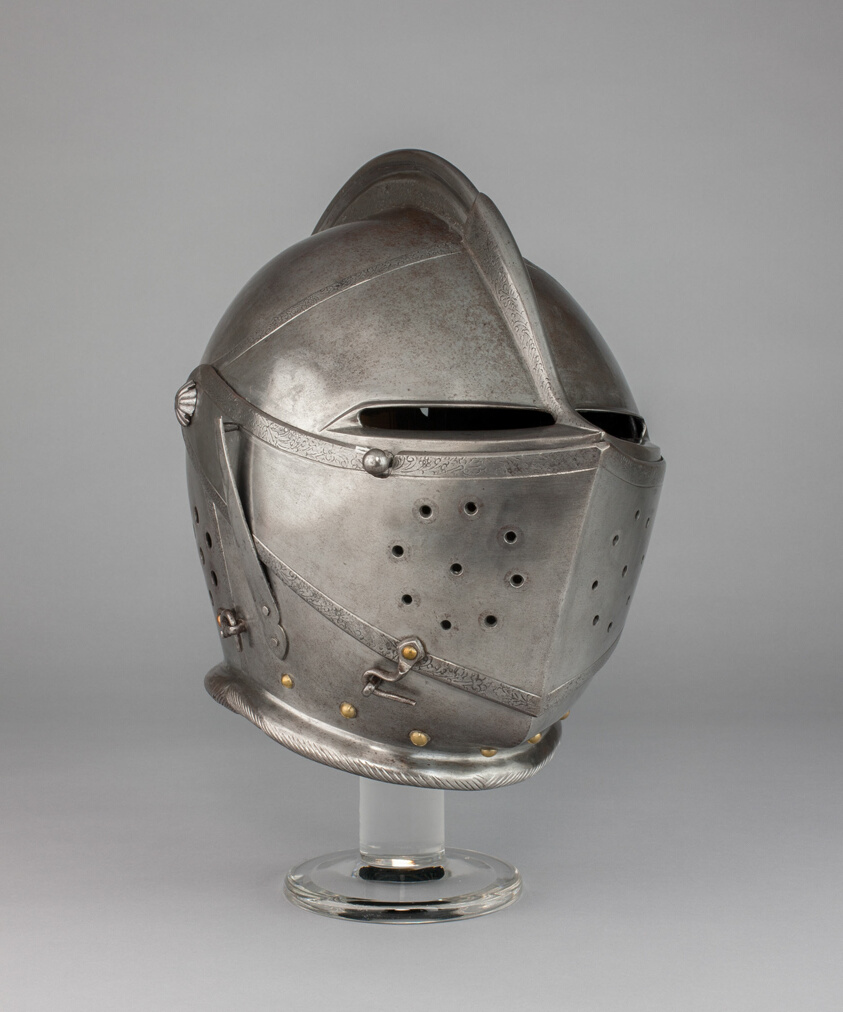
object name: Armor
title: Close Helmet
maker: Dutch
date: 1610/20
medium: Steel and gilding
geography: Netherlands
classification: suit-helmet; armor; arms and armor